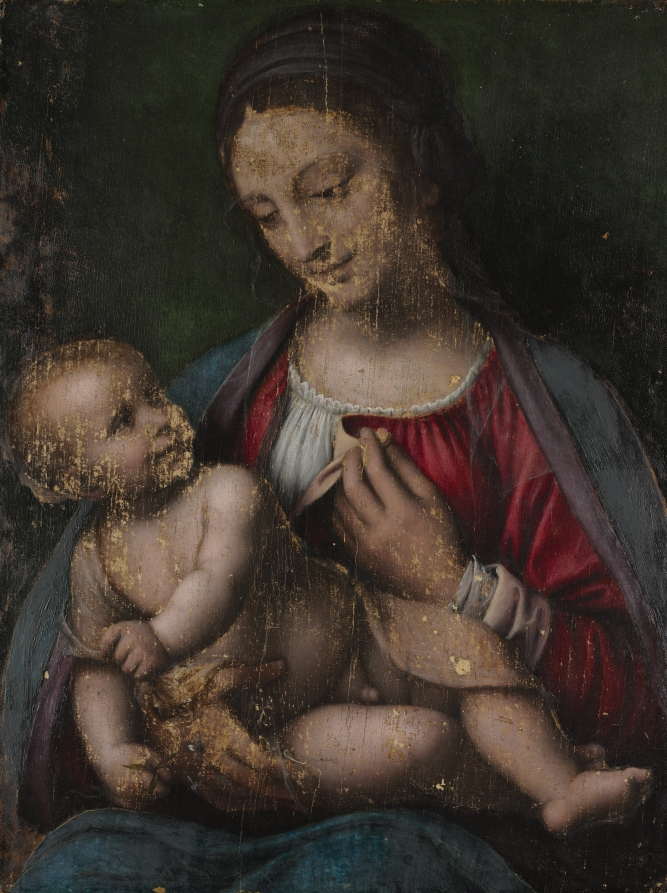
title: Virgin and Child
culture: Italy, Milan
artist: attributed to Bernardino Luini (Italian, c. 1480-c. 1532)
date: 1500s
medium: oil on wood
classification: Painting